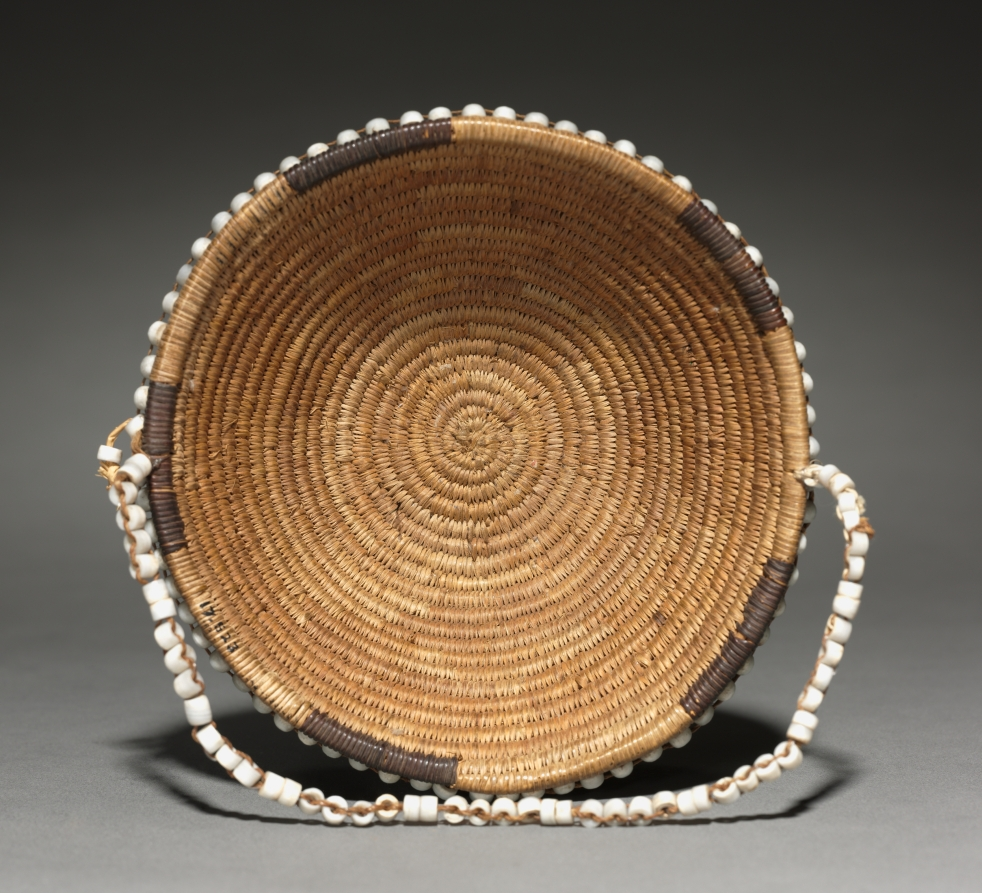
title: Gift Basket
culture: California, Pomo, late 19th- early 20th century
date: c. 1895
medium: Bulrush, Sedge with Mallard and Meadowlark Feathers, and clam shells; Coiled (3 rods)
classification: Basketry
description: Although this basket probably was not made for native use, the feathered basket is based on an older type that was exchanged among natives as a treasured gift on such occasions as ceremonies that marked the stages of life. The feathers and shell beads are symbols of prestige and wealth.